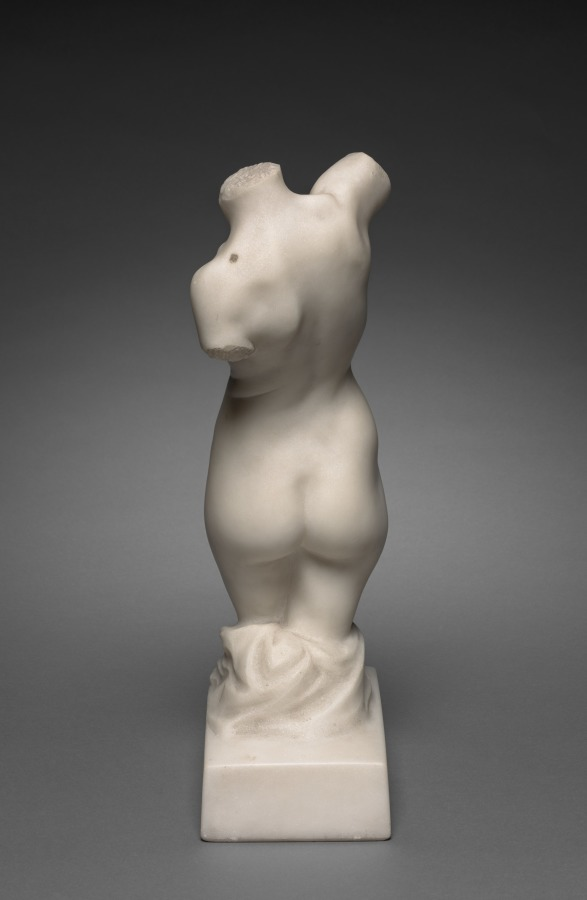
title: Torso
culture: America, Ohio, Cleveland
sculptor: Max Kalish (American, born Russian Empire [now Lithuania], 1891–1945)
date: 1924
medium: marble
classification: Sculpture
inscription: Signed on right side near side of base.: "M. Kalish 24"